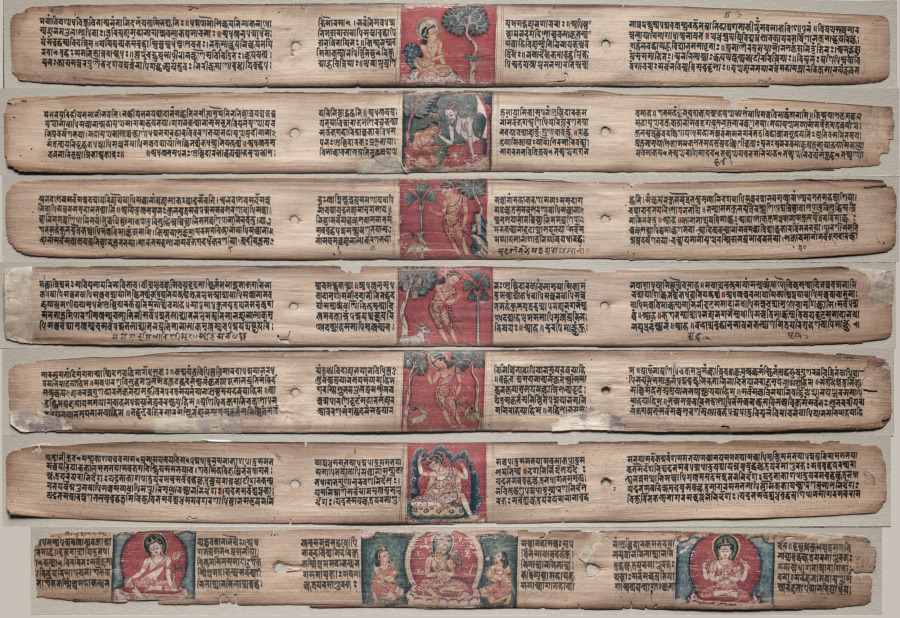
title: Seven Leaves from a Manuscript of the Gandavyuha-sutra (Scripture of the Supreme Array)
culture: Nepal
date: 1000s-1100s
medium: Gum tempera and ink on palm leaves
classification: Painting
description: These pages come from a long horizontal book of 355 palm leaves, now dispersed among many collections. Featuring the pilgrim Sudhana on his quest to reach enlightenment, the text was especially influential in the spread of Buddhism to East Asia. These leaves are from the sole surviving illustrated manuscript of this text in its original language of Sanskrit.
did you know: Russian artist Svyatoslav Roerich (1904–1993) collected 144 pages of this manuscript in India.